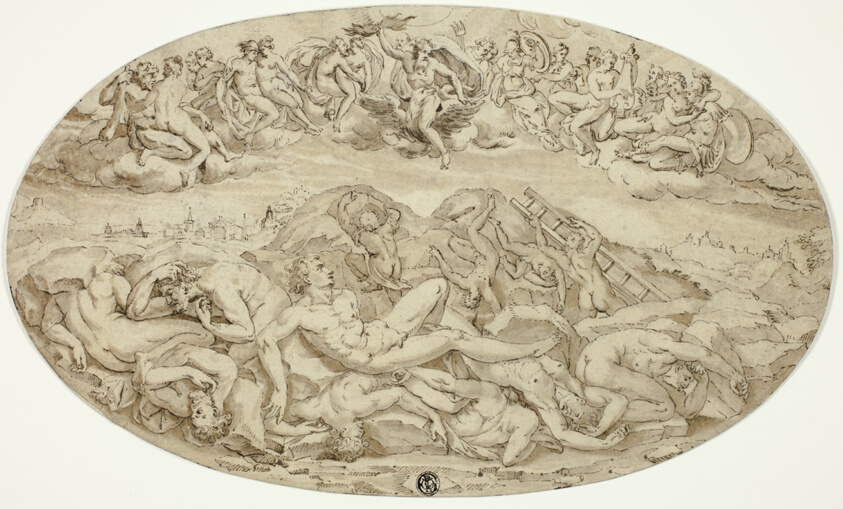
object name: Drawing and Watercolor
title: Fall of the Giants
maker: After Guglielmo della Porta; Italian, 1500/10-1577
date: 1550/59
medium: Pen and brown ink, over traces of black chalk, on cream laid paper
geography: Italy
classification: ink with wash; drawings (visual works); prints and drawing